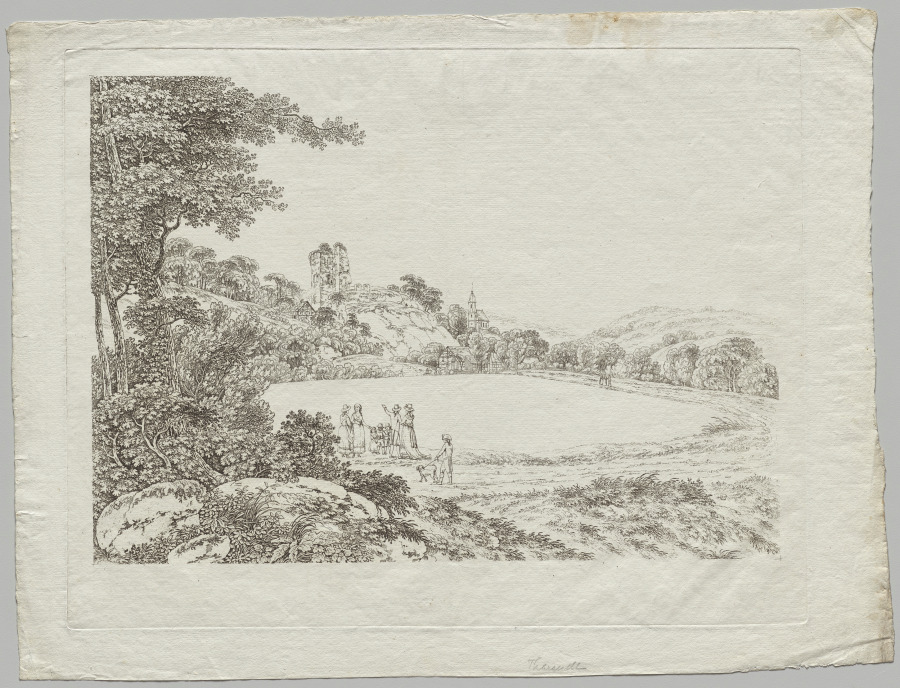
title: Landscape with Tharandt Castle Ruins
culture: Switzerland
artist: Adrian Zingg (Swiss, 1734–1816)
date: c. 1800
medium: etching on laid paper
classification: Print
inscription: watermark: D & G BLAUW (High Crown countermark)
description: Swiss artist Adrian Zingg made the landscape of Saxony his primary and almost exclusive subject and sought out dramatic views, often featuring the country’s distinctive waterfalls, landscapes, and ruins, to convey its grandeur while maintaining a topographical precision. These two prints depict the ruins of Tharandt castle, a medieval structure outside Dresden. Zingg traveled to the site to sketch with friends, captivated by the juxtaposition between nature’s grandeur and the castle’s impermanence.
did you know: Soon after Adrian Zingg sketched this view in the village of Tharandt, the area became popular among tourists for its dramatic views.